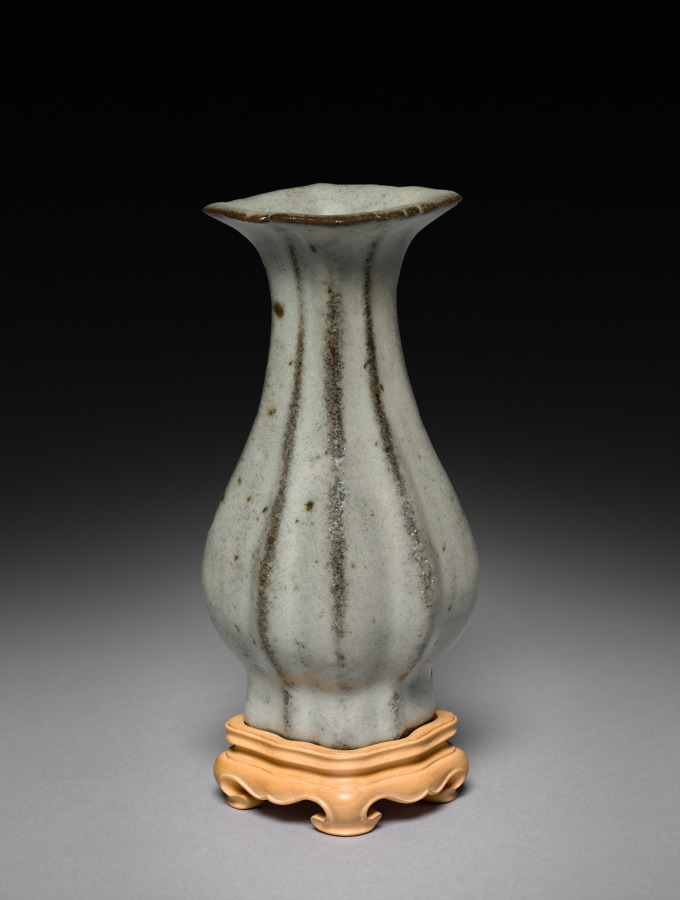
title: Lobed Vase: Guan ware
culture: China, Hangzhou, Suburban Altar Kiln, Southern Song dynasty (1127-1279)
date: 1127–1279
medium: glazed reddish-brown porcelain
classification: Ceramic